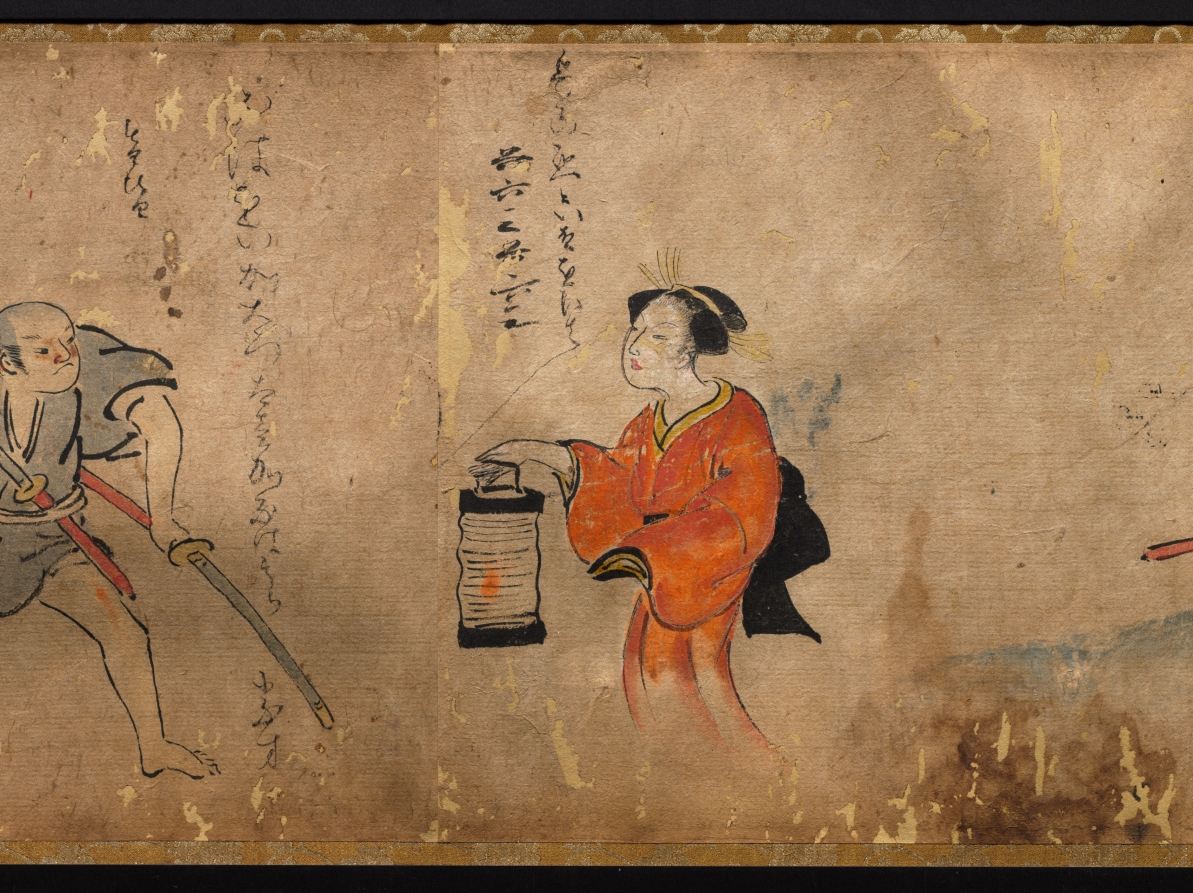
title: The Illustrated Tale of Oishi Hyōroku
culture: Japan, Edo period (1615–1868)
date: 1700s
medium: handscroll; ink and color on paper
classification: Painting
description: This incomplete handscroll illustrates part of the story of Oishi Hyoroku, a young man tasked with battling fox apparitions who were creating problems in his town. In other extant versions of the scroll, the story is set in the fall of 1624 in Kagoshima in southern Japan. Throughout the story, Hyoroku is tricked and terrified by the foxes that shift their shapes into a variety of monstrous phantoms. After repeated humiliations, he eventually captures two of the foxes. In this version, colloquial texts that function like text blurbs in comics appear throughout the scroll, but the main text is missing.